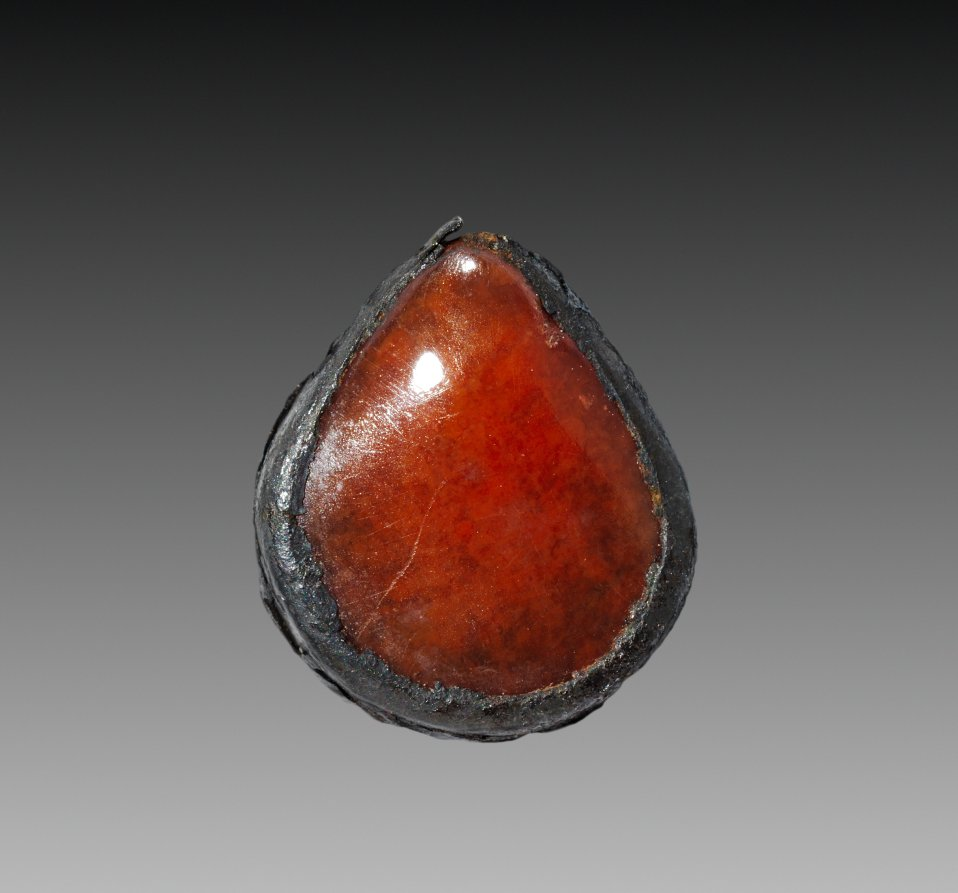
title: Oyster-Shell Pendant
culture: Egypt, Middle Kingdom (2040–1648 BCE), Dynasty 12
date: 1980–1801 BCE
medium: carnelian and silver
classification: Jewelry